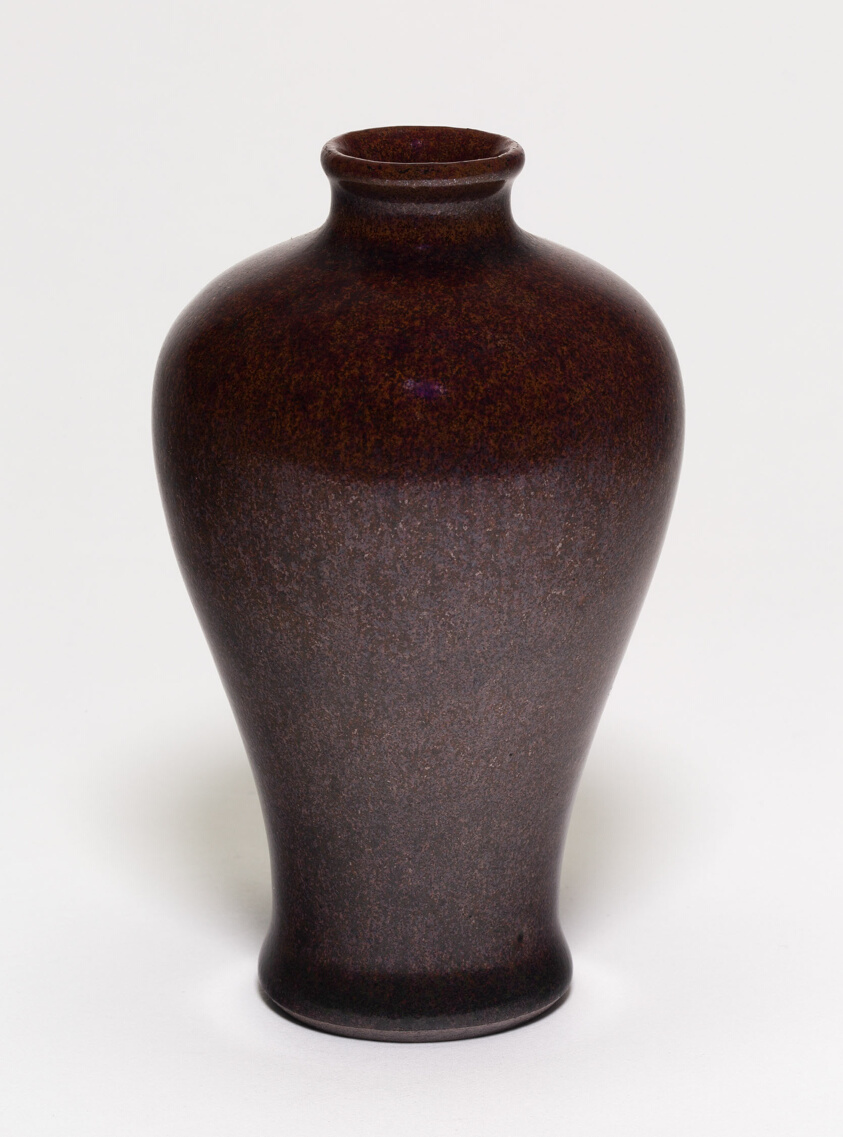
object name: Vessel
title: Baluster-Shaped Vase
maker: China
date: Qing dynasty (1644–1911), Qianlong period (1736–1795)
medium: Porcelain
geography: China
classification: porcelain; asian art; ceramics